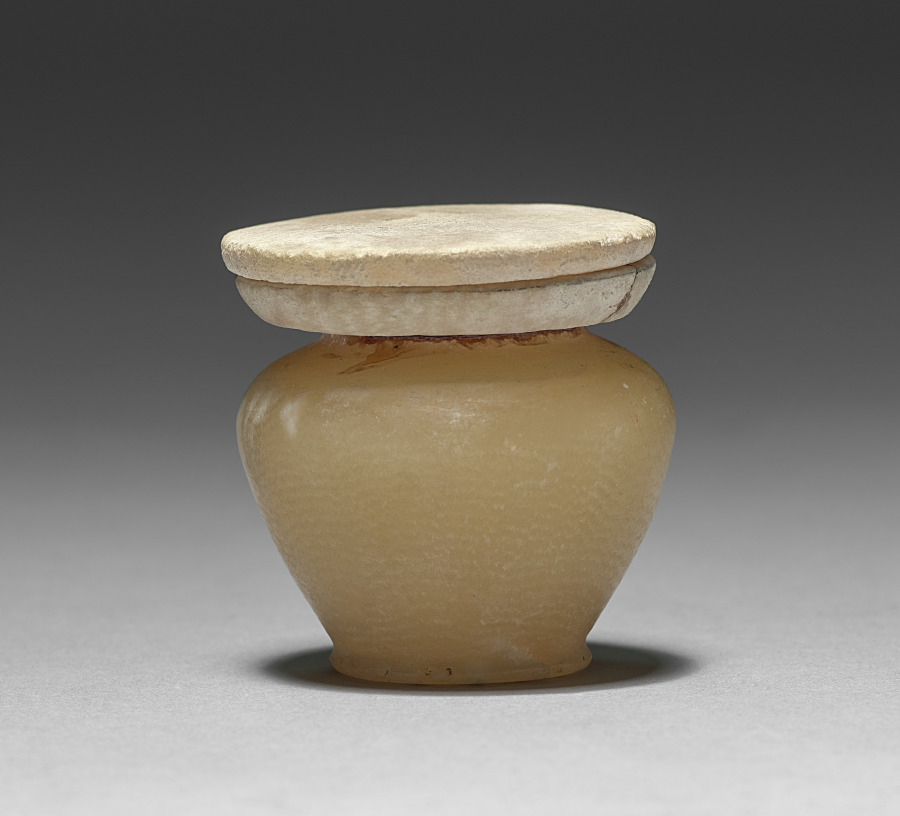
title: Kohl Jar with Lid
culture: Egypt, Middle Kingdom (2040–1648 BCE), Dynasty 12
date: 1980–1801 BCE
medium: travertine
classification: Vessels